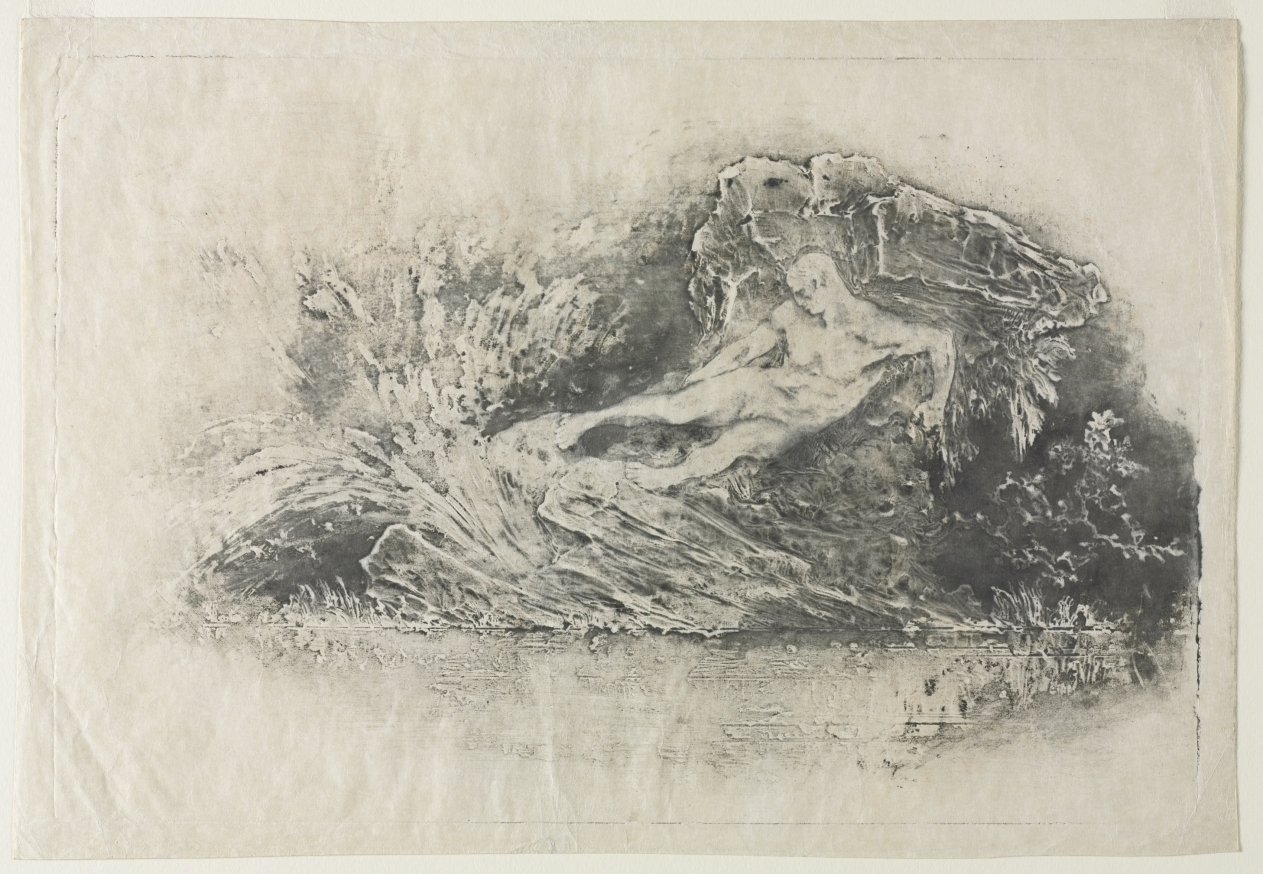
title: Prometheus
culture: France, 20th century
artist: Pierre Roche (French, 1855–1922)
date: c. early 1900s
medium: gypsograph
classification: Print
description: Since Roche was primarily a sculptor and ceramist, he sought a more three-dimensional printmaking technique and experimented with the gypsograph, which is printed in relief. The figure of Prometheus (a Greek mythological figure punished by Zeus) appears to have been carved from the rocky outcropping behind it. At the same time, Roche created the effect of transparent water and reflection in the lower portion of the composition.